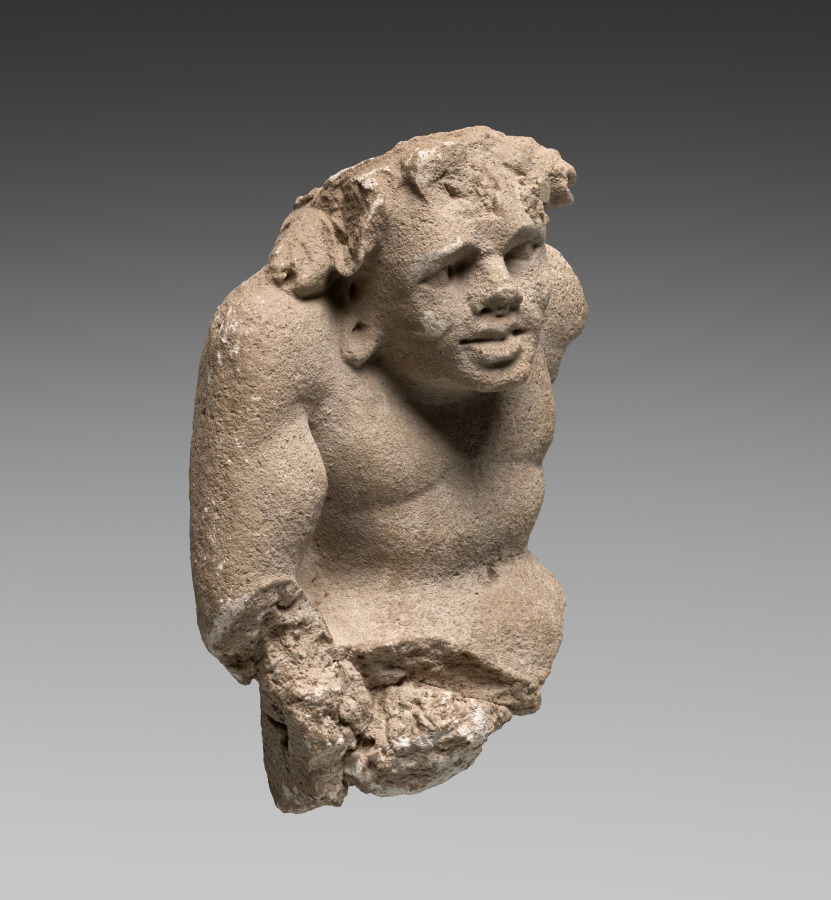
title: Male Atlantean figure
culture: Afghanistan, Hadda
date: c. 300 CE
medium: stucco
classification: Sculpture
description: The musculature, thick curly locks of hair, and deeply inset eyes of this fragmentary figure show the sculptor's incorporation of Greco-Roman forms. His hunched posture suggests that he supported a heavy weight, such as the dome of a stupa on his back. Rows of figures would have visually supported the stupa, in which relics of the Buddha or other revered Buddhist leader were interred.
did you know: Most sculptures from Hadda are preserved in museums, since the site was razed in 2001.